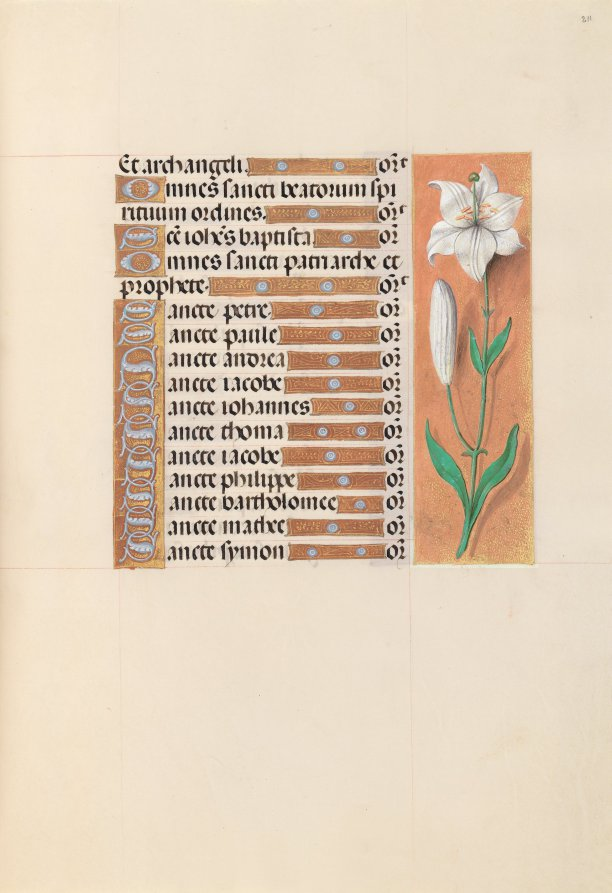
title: Hours of Queen Isabella the Catholic, Queen of Spain: Fol. 211r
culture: Flanders, Ghent and Bruges, late 15th century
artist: Master of the First Prayerbook of Maximillian (Flemish, c. 1444–1519)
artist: and Associates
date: c. 1500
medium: ink, tempera, and gold on vellum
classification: Bound Volume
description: This manuscript was illuminated by a circle of at least five highly organized manuscript painters active in the Flemish cities of Ghent and Bruges. The principal illuminator was Alexander Bening, who painted the majority of the book's miniatures. Manuscripts produced by this circle of artists are renowned for the decoration of their borders, which typically feature a rich variety of realistically-painted flowers, birds, and butterflies. This prayer book, called a book of hours, was intended not for a cleric, but for the private devotions of a lay person-in this case, Isabella the Catholic, Queen of Spain (1451-1504). Isabella's coat of arms embellishes the book's frontispiece. It is unlikely that the book was commissioned by the Queen herself; rather, she probably received it as a diplomatic gift from someone courting her patronage, perhaps Cardinal Francisco Jimenez de Cisneros. A Franciscan friar, Jimenez was dependent upon Isabella for his advancement, first to the post of Queen's confessor in 1492, and then to Archbishop of Toledo in 1495.